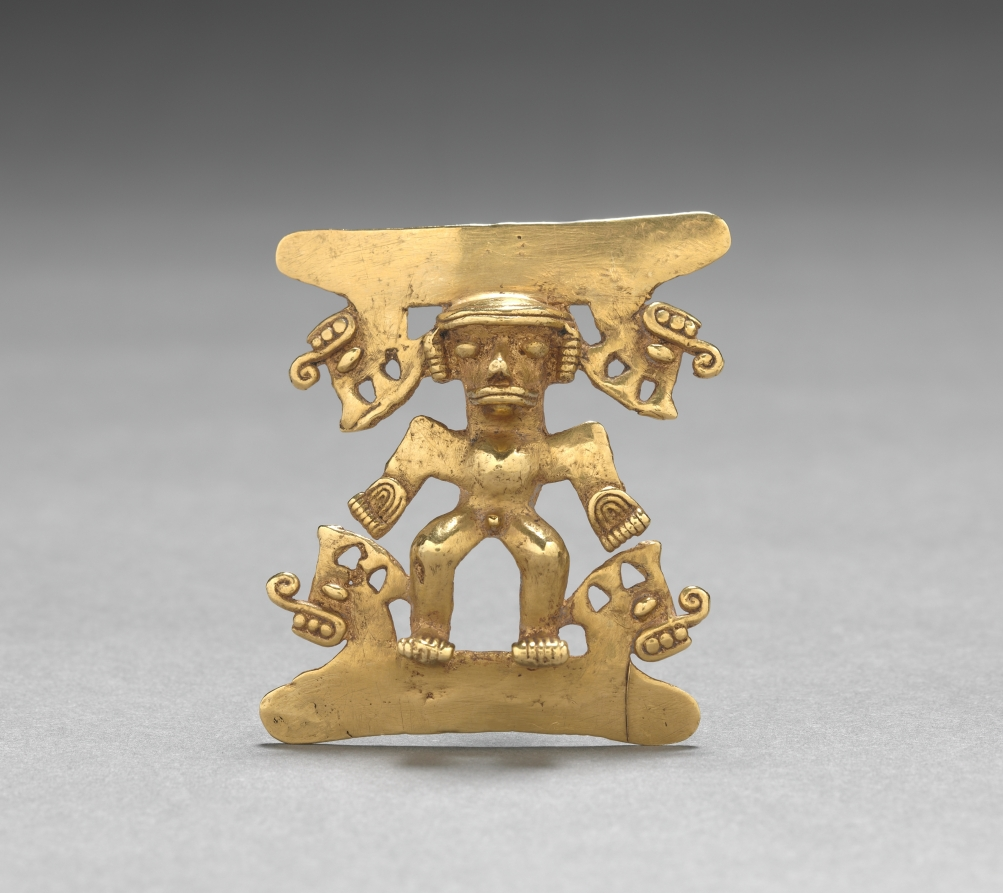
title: Figurine Pendant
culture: Western Panama, Veraguas-Gran Chiriquí Style, 8th-16th Century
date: c. 700–1550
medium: cast and hammered gold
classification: Metalwork